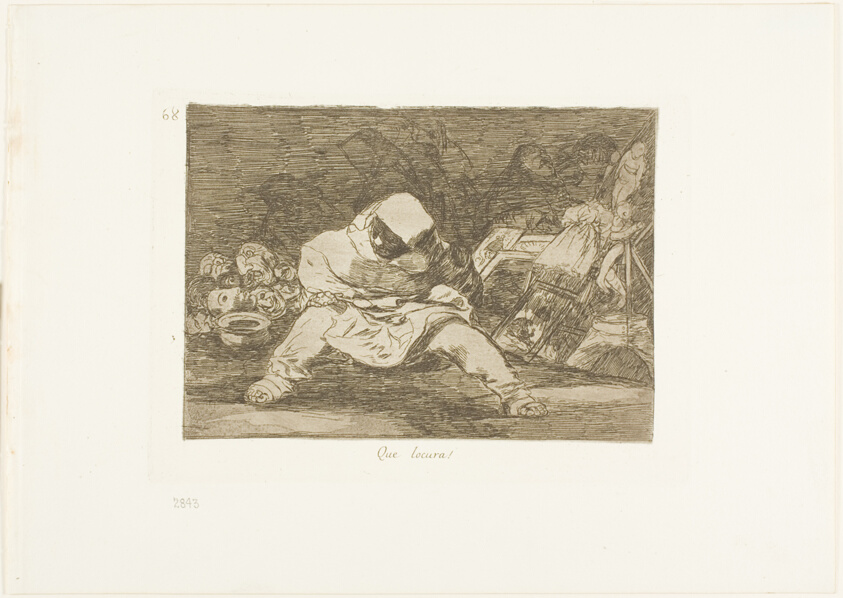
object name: Print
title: What madness!, plate 68 from The Disasters of War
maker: Francisco José de Goya y Lucientes (Spanish, 1746-1828)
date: 1815/20, published 1863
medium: Etching, lavis and burin on ivory wove paper with gilt edges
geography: Spain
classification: etching; print; prints and drawing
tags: war